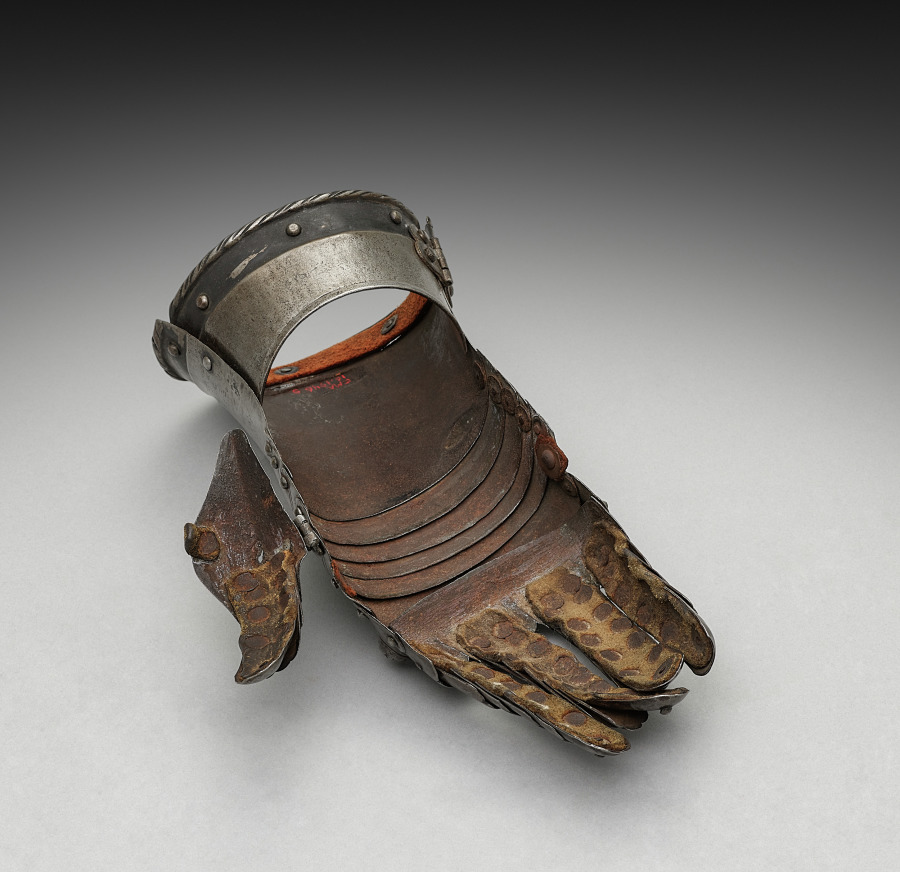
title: Right Gauntlet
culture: Germany, 19th century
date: 1801–1900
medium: steel with black paint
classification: Arms and Armor